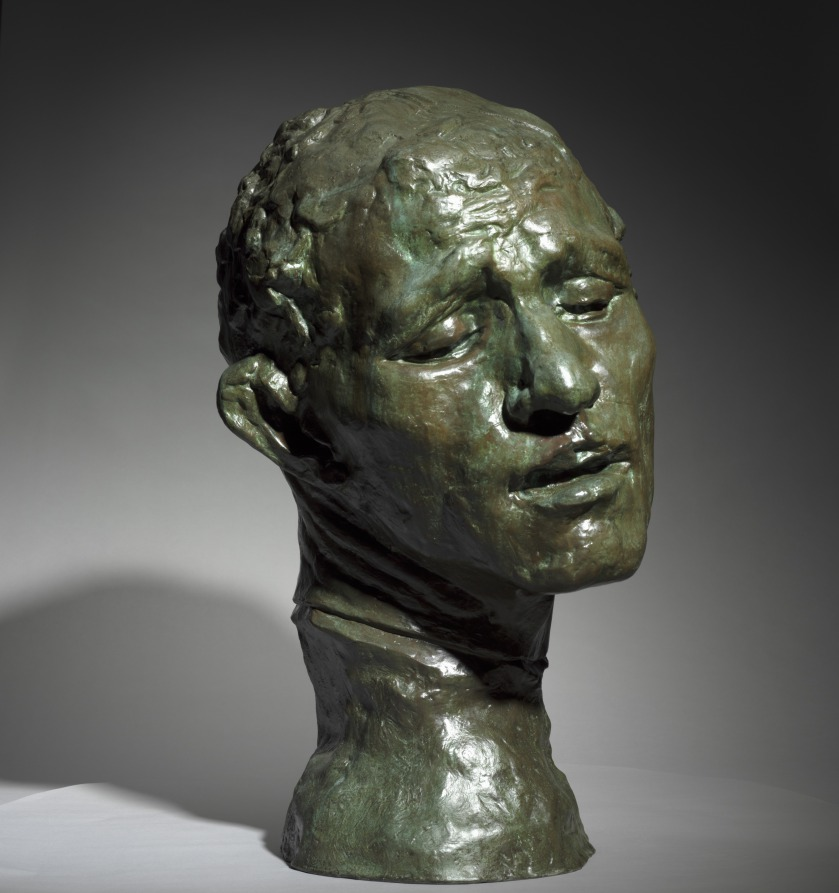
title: Heroic Head of Pierre de Wissant, One of the Burghers of Calais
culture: France, 19th century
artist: Auguste Rodin (French, 1840–1917)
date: 1886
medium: bronze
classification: Sculpture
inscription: inscribed at neck, left: A.Rodin; inscribed lower back: Alexis Rudier/Fondeur-Paris.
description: This sculpture depicts one of the figures in Rodin’s large public monument The Burghers of Calais (1884–89), featuring six French men who volunteered to be taken prisoner by the English in exchange for lifting the siege of Calais during the Hundred Years War (1337–1453). Pierre de Wissant’s anguished expression suggests extreme mental suffering as he contemplates his expected execution. Rodin exhibited a life-size version of the figure as an independent work before completing the monument. He later made multiple versions in various sizes and media.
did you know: This sculpture depicts the head of a figure from Rodin's large public monument The Burghers of Calais (1884-89). The CMA also owns a plaster version of the head.